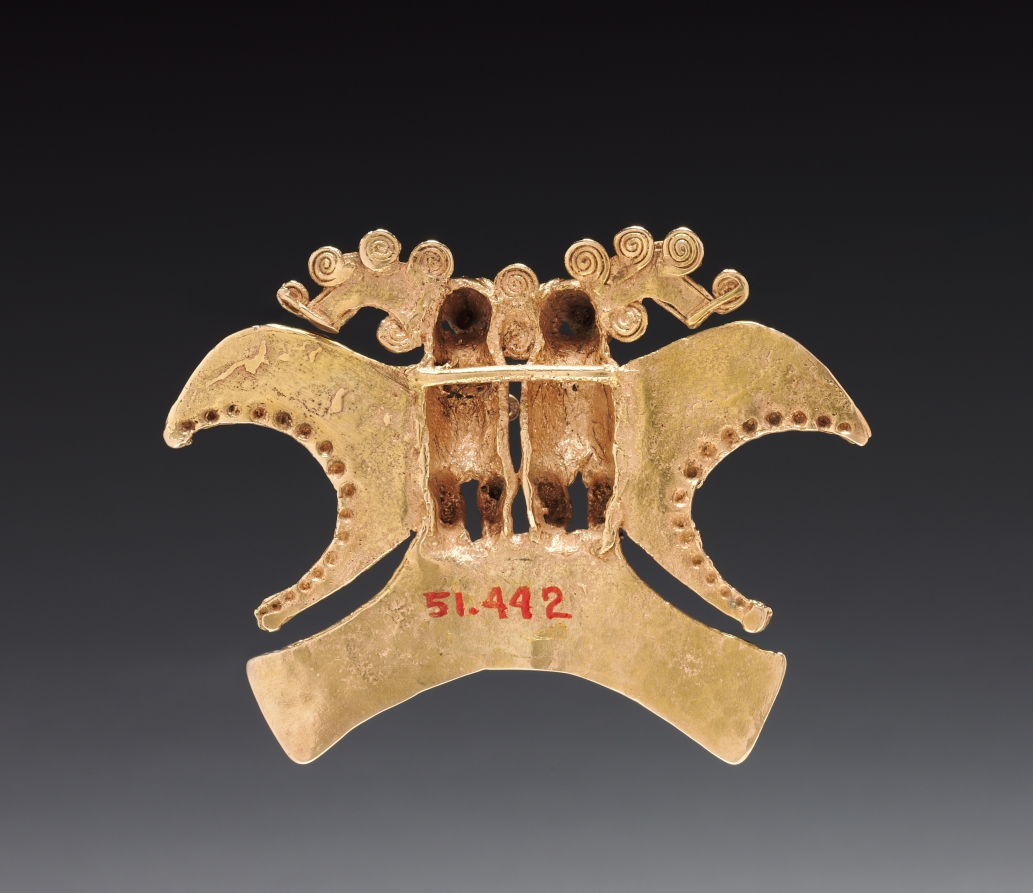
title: Double Bird-Headed Figure Pendant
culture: Costa Rica, Diquís region, 11th-16th century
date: c. 1000–1500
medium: cast and hammered gold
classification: Metalwork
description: Among the pendants shown here are a crustacean (1943.290), an animal-headed figure (1948.18), and two pendants featuring birds (1951.442 and 1946.223). The latter were dubbed aguilas (eagles) by Christopher Columbus, who saw natives wearing them as necklace ornaments. Modern researchers are not as sure of the species shown, but some believe that they are birds of prey because talons and beaks are prominent and often clutch something, in one example here a small, disembodied head that holds a clapper. In both examples, two tufts in the form of crocodiles in profile flank the birds’ heads.